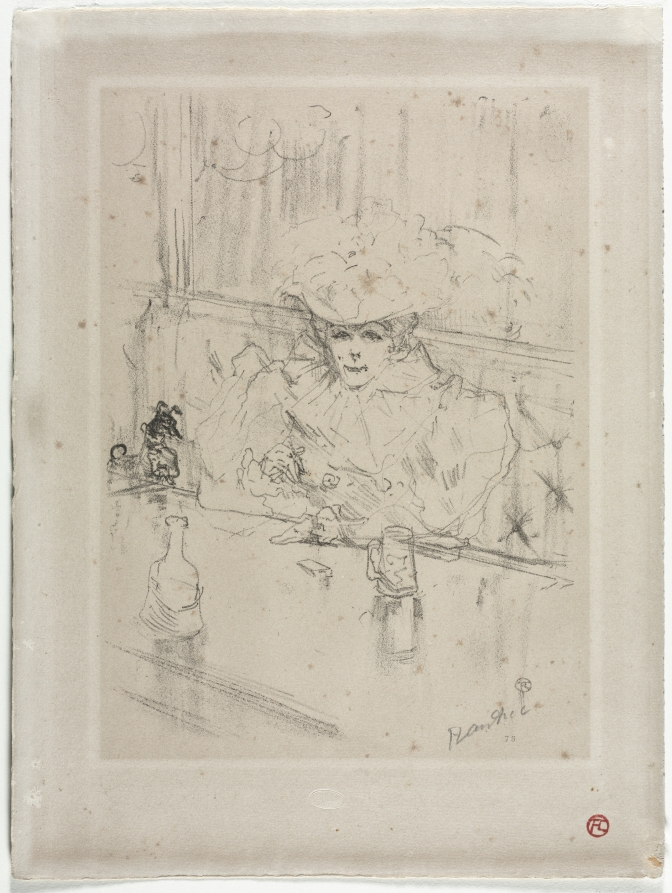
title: In the Hanneton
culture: France, 19th century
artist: Henri de Toulouse-Lautrec (French, 1864–1901)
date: 1898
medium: lithograph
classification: Print